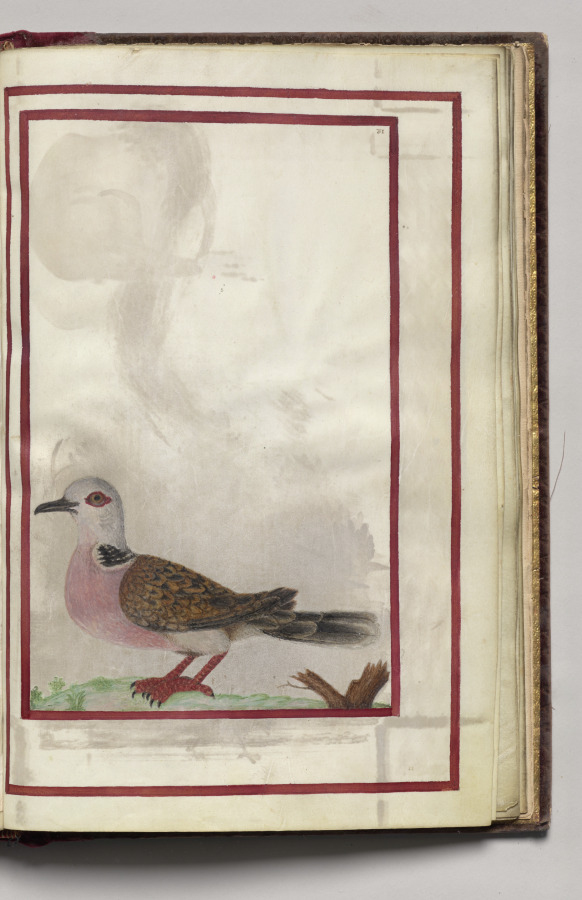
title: Pink Breasted Bird, folio 39 (recto), from Florilegium (A Book of Flower Studies)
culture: France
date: 1608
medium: watercolor, ink, silver, and gold over occasional traces of pencil, on vellum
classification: Bound Volume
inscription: Dated: Poitiers 1608 (on frontispiece) Signed: On frontispiece in black ink, lower right: Van Kuyk Notation on drawing: Frontispiece: in pencil, lower margin: * élève de Van Kessel, peintre flammand (* in pencil also appears in front of Van Kuyk's name).